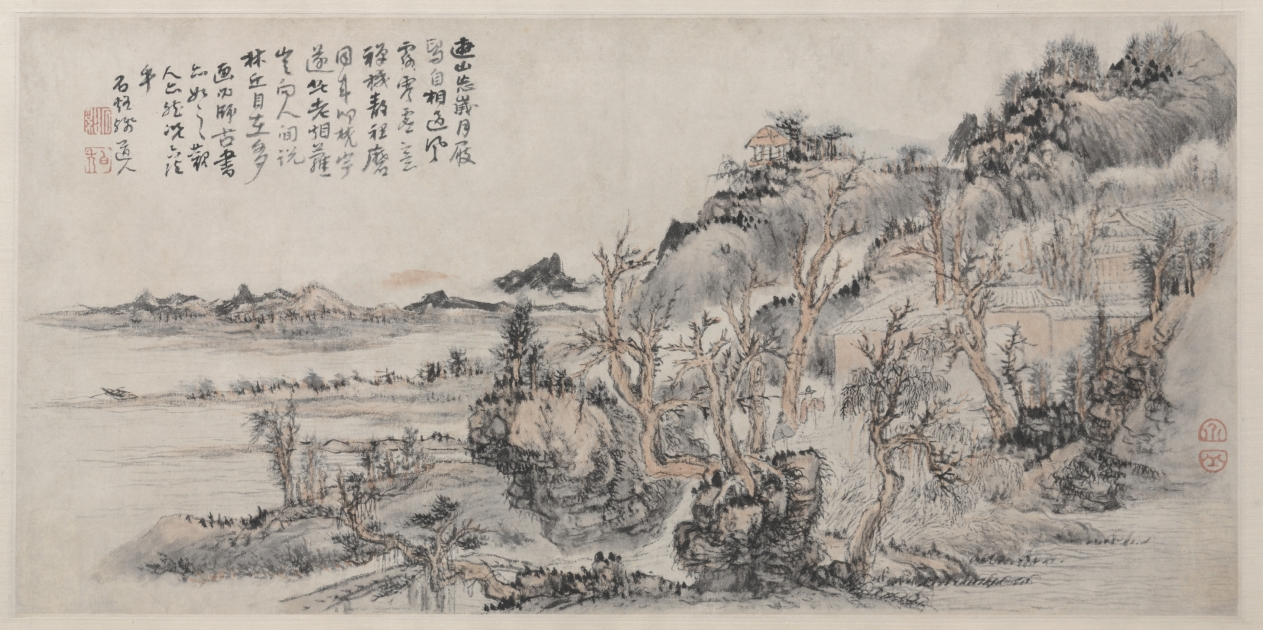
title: Spring Landscape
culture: China, Qing dynasty (1644–1911)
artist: Kuncan (Chinese, 1612–c. 1673)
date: 1666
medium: double album leaf mounted as a handscroll; ink and color on paper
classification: Painting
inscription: 遊山忘歲月，屐舄自相過。 風露寒虚意，禪機靜裡磨。 同年叩梵宇，遂此老煙蘿。 豈向人間說，林丘自在多。 畫必師古，書亦如之。觀人亦然，况六法乎。石谿殘道人 印二：石谿，白秃。另有「介丘」一印在右邊。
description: One of the acclaimed "Four Monks" (the other three being Zhu Da, Daoji, and Hongren), Kuncan was known for the rough and rustic style of his landscape paintings. This painting was once part of a large album, painted at the request of his friend Cheng Zhengkui (active 1630–74), with whom he shared a common interest in painting and poetry. The inscription contains a poem, which reads: Wandering through mountains and oblivious of time, We met in casual shoes (and attires). The wind and dew drops harbor a chilling emptiness. Only with patience and silence can the Chan inspiration come. . . .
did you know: This spring scene was once accompanied by album leaves of summer (now in the Museum für Asiatiche Kunst, Berlin) and autumn and winter (now in the British Museum).